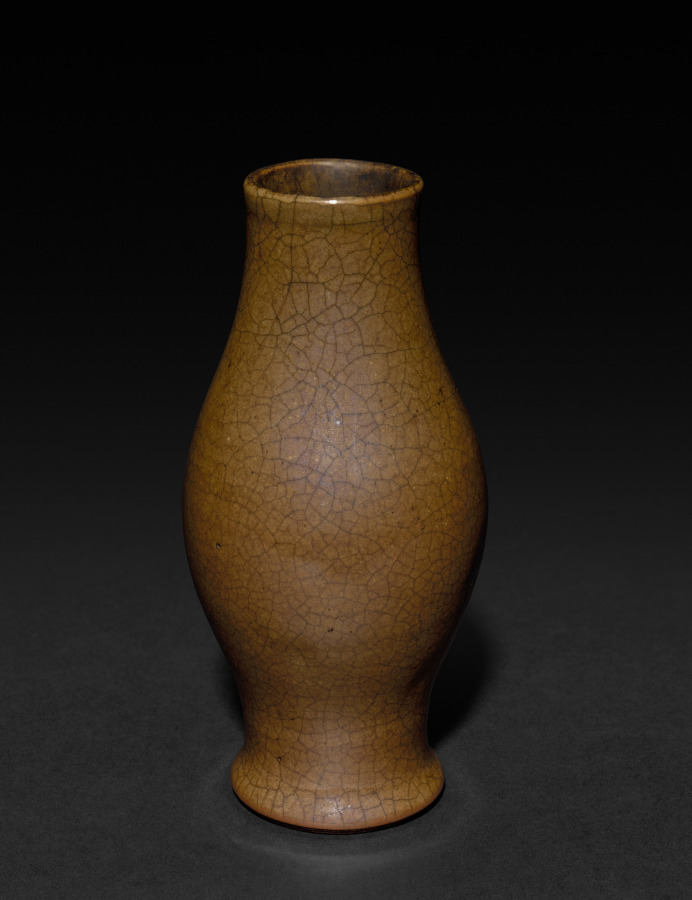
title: Vase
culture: China, Qing dynasty (1644-1911), Kangxi reign (1661-1722)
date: 1662–1722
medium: porcelain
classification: Ceramic